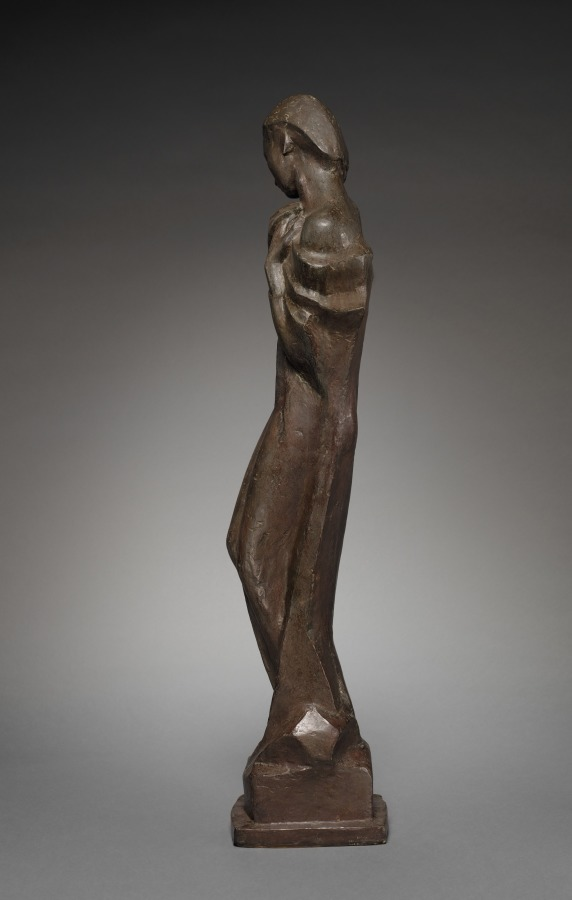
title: Adagio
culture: Germany, 20th century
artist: George Kolbe (German, 1877–1947)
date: 1923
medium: gilt bronze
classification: Sculpture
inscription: Signed lower left corner: "GK II"